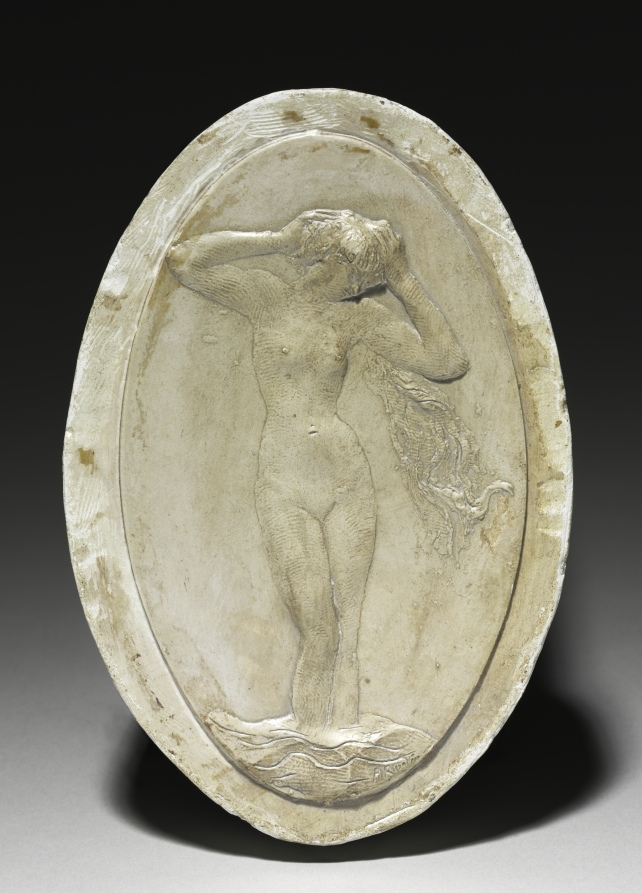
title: Vénus Astarté (Semitic goddess of fertility and love)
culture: France, early 20th Century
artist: Auguste Rodin (French, 1840–1917)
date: c. 1900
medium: plaster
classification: Sculpture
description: This relief of a female nude standing in water may represent the only time the great French sculptor Auguste Rodin provided an ornament for a precious object: a gold and enamel hand mirror designed by Felix Bracquemond (1833–1914). The mirror—acquired by the museum in 1978—was made for Baron Joseph Vitta, one of Rodin's most important patrons during the years around 1900, and it was probably for this reason that the artist agreed to the commission. This plaster cast of Rodin's nude was an intermediate version of the subject. Although the images on the mirror and the plaster cast were clearly derived from the same mold, there are significant differences in the figure's hair. Rodin probably changed the wax version (from which the gold relief of the mirror was made by lost-wax casting) before he used it.